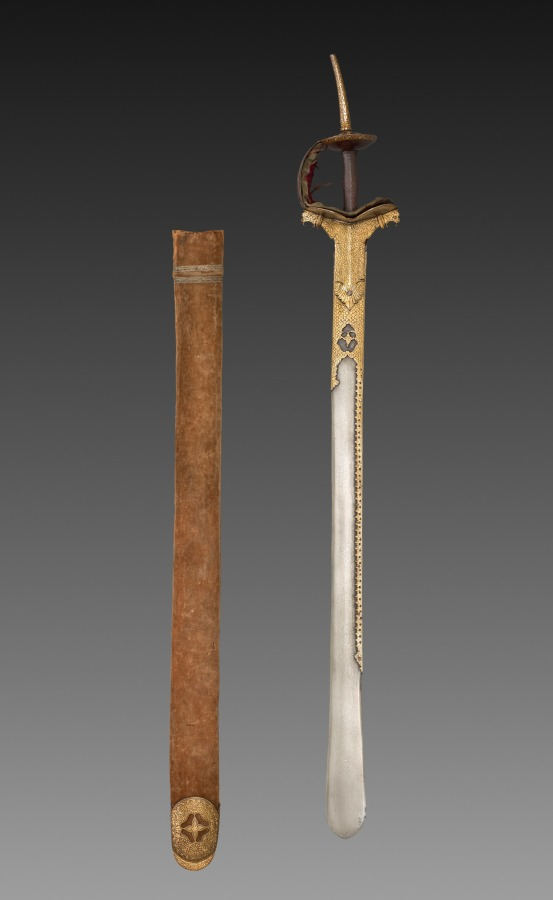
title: Sword with scabbard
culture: India, perhaps Deccan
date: 1700s–1800s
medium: Watered steel blade with iron hilt inlaid with gold; velvet lining with leather straps; wooden scabbard with velvet case and metallic threads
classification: Arms and Armor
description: Straight swords were typical of those used among military and aristocratic circles in the southern regions of the Deccan, in contrast to the curved swords favored by Central Asian equestrians. Increased contact between the Mughal north and the Deccan south during the 1600s led to the appearance of the Deccan-style sword in courtly portraits made during the time of Jahangir and Shah Jahan, and later.